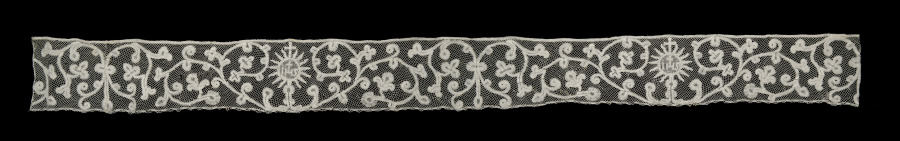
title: Lace Edging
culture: Italy, Milan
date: 1700s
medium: Linen: bobbin lace design on mesh ground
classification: Lace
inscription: "I H S."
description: The IHS symbol can be seen in this piece of lace. It is a monogram representing the first three letters of Jesus’s name in Greek: iota, eta, and sigma. It serves as a visual abbreviation of Jesus Christ and is often found on ecclesiastical textiles.